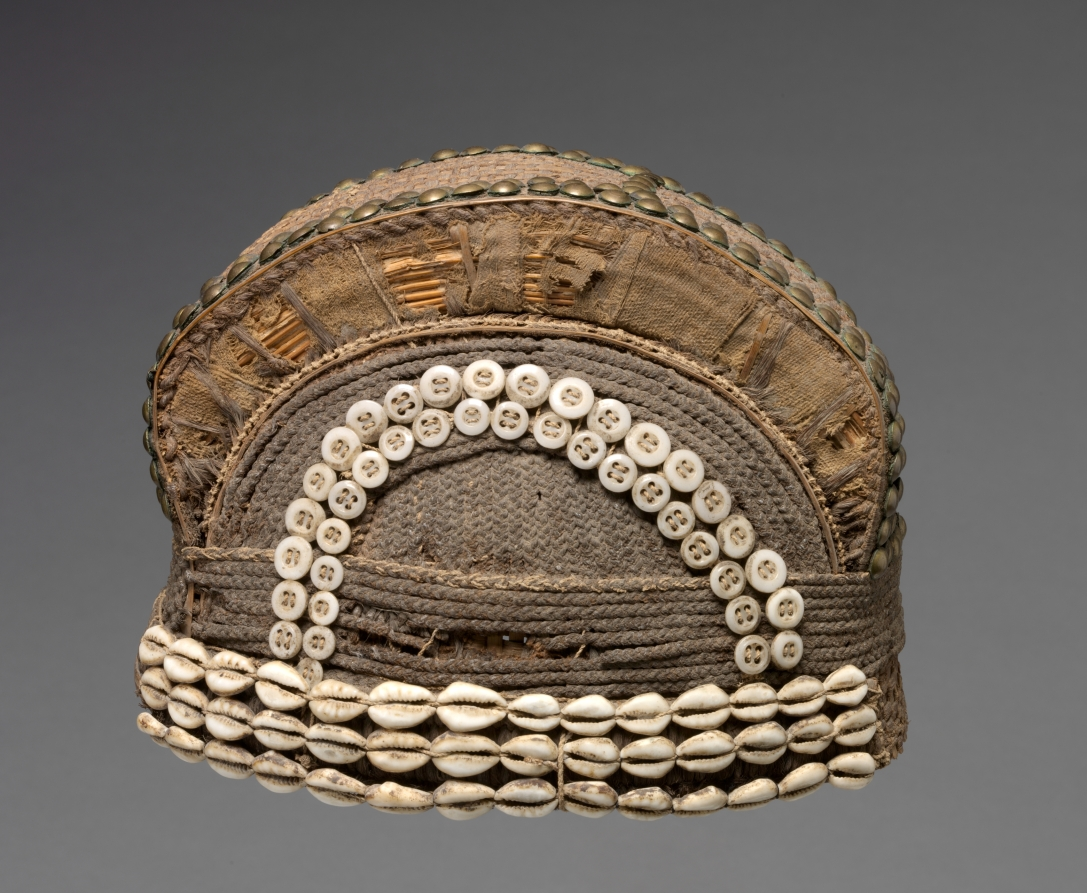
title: Headpiece (nlo-o-ngo)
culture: Africa, Central Africa, Gabon, Fang style, unknown maker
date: early 1900s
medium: Plant fibers, cloth, hair, cowrie shells, buttons, upholstery studs, and thread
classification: Garment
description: This headpiece (nlo-o-ngo) was made to look like a similarly shaped hairstyle. While the coiffure gained height from inserts tucked under the hair, here the underlying basket was woven into a central ridge. Plant fibers were woven or braided to mimic hairstyling techniques. Rarely removed, the hat gave the appearance of elaborately styled and decorated hair. Three rows of cowries around the band evoke a shell or bead headband, while the metal furniture tacks are the same as would have been inserted into the hair. Existing in many styles, men or women wore these wiglike headdresses to signify status, group identity, or social roles.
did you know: Sculptors depicted these characteristic headpieces and coiffures in figurative works that guarded the remains of ancestors.